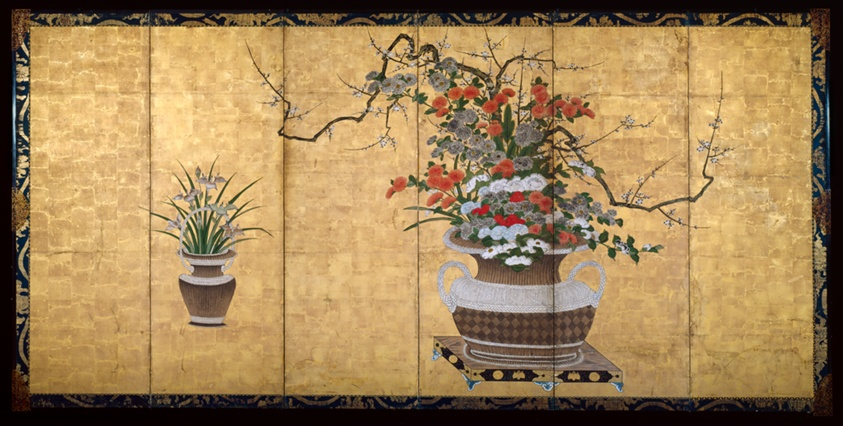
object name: Furnishings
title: Baskets with Flowers of the Four Seasons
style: Japanese (culture or style)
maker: Artist unknown; Japanese, active 19th century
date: 19th century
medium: Six-panel screen; ink, colors, and gold on paper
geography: Japan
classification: screen; painting; asian art